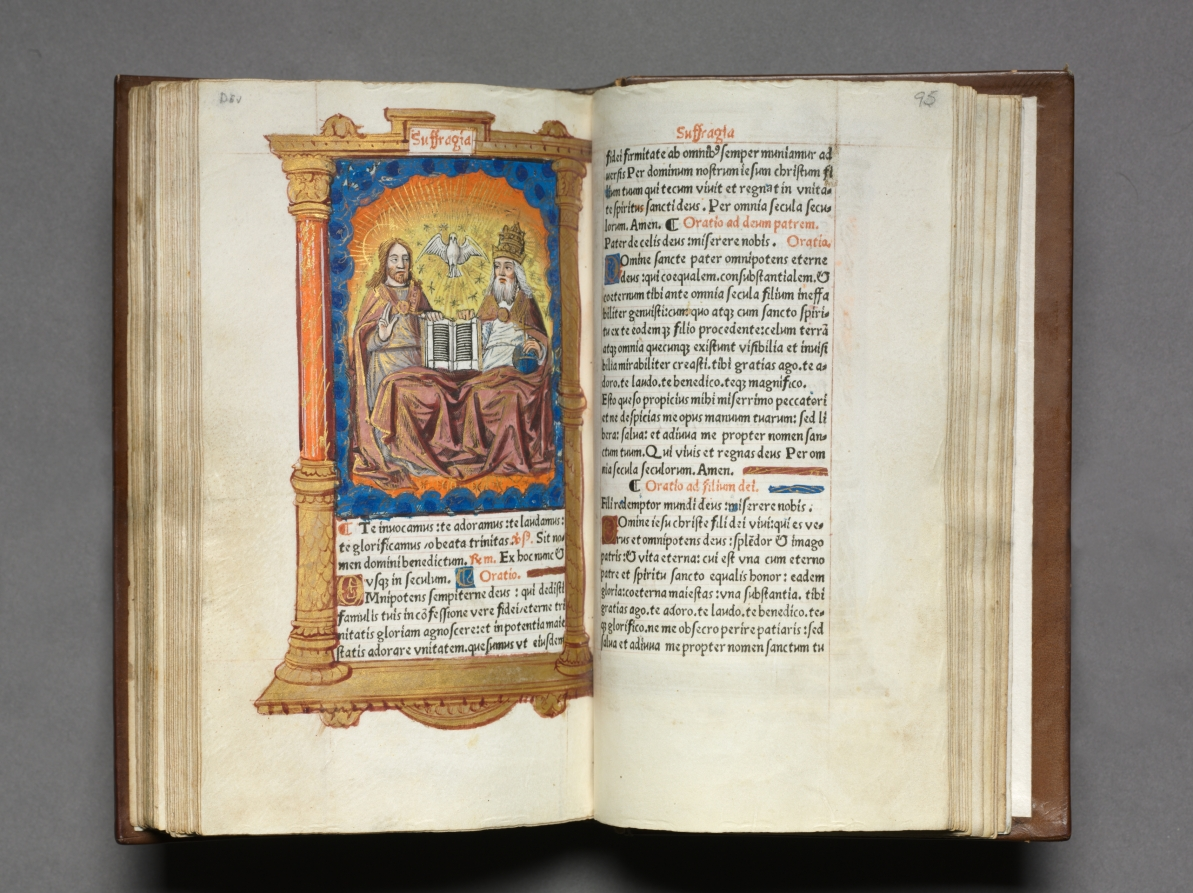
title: Printed Book of Hours (Use of Rome): fol. 95r, The Trinity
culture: France, Paris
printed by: Guillaume Le Rouge (French, Paris, active 1493–1517)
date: 1510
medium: 112 Printed folios on parchment, bound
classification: Bound Volume